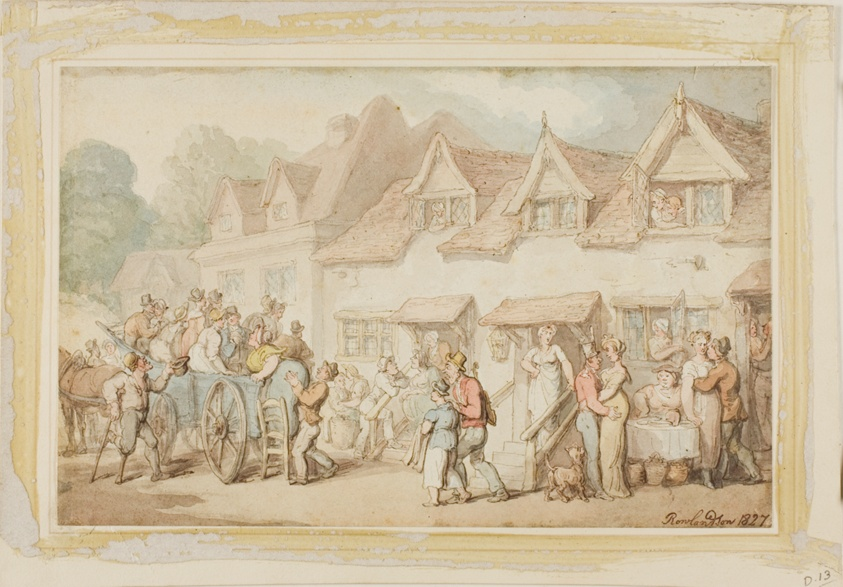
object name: Drawing and Watercolor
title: Coach Changing Horses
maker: Thomas Rowlandson (English, 1756-1827)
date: 1827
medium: Pen and brown ink with brush and watercolor, over traces of graphite, on ivory wove paper, laid down on board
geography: England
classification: watercolor; drawings (visual works); prints and drawing